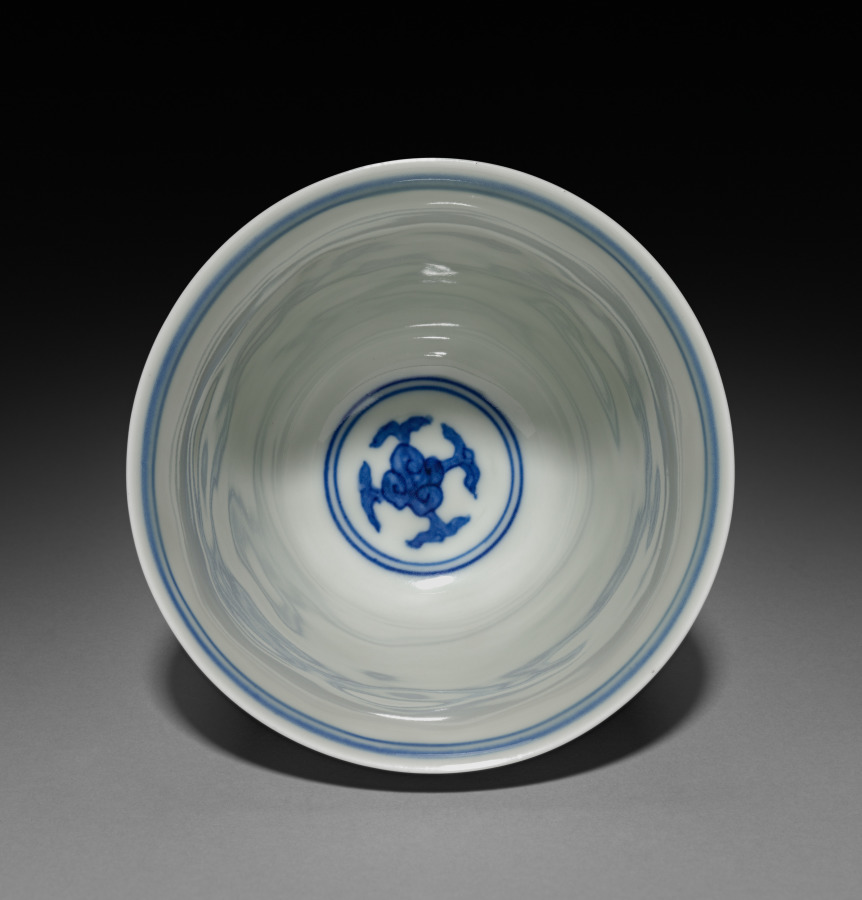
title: Cup with Dragons and Phoenixes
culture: China, Jiangxi province, Jingdezhen kilns, Ming dynasty (1368-1644), Jiajing mark and reign (1522-66)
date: 1522–66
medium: porcelain with underglaze blue decoration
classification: Ceramic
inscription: 大明嘉靖年製